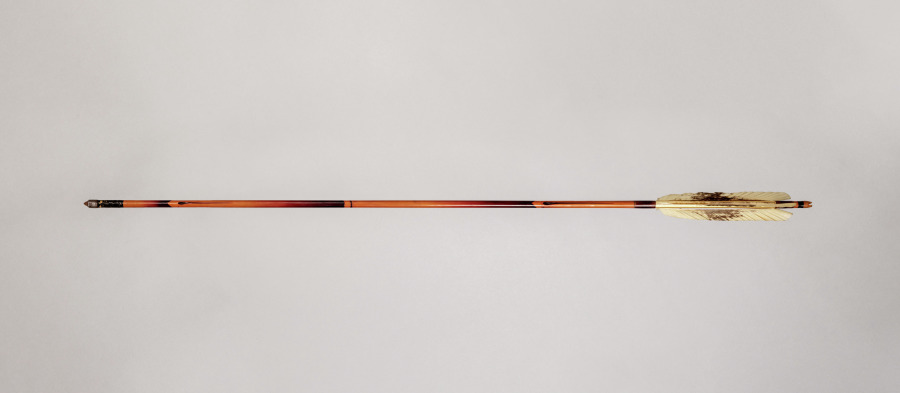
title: Arrow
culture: Japan, Edo period (1615–1868) to Meiji period (1868–1912)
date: 1800s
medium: bamboo shaft tipped with metal point and heeled with feathers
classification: Arms and Armor